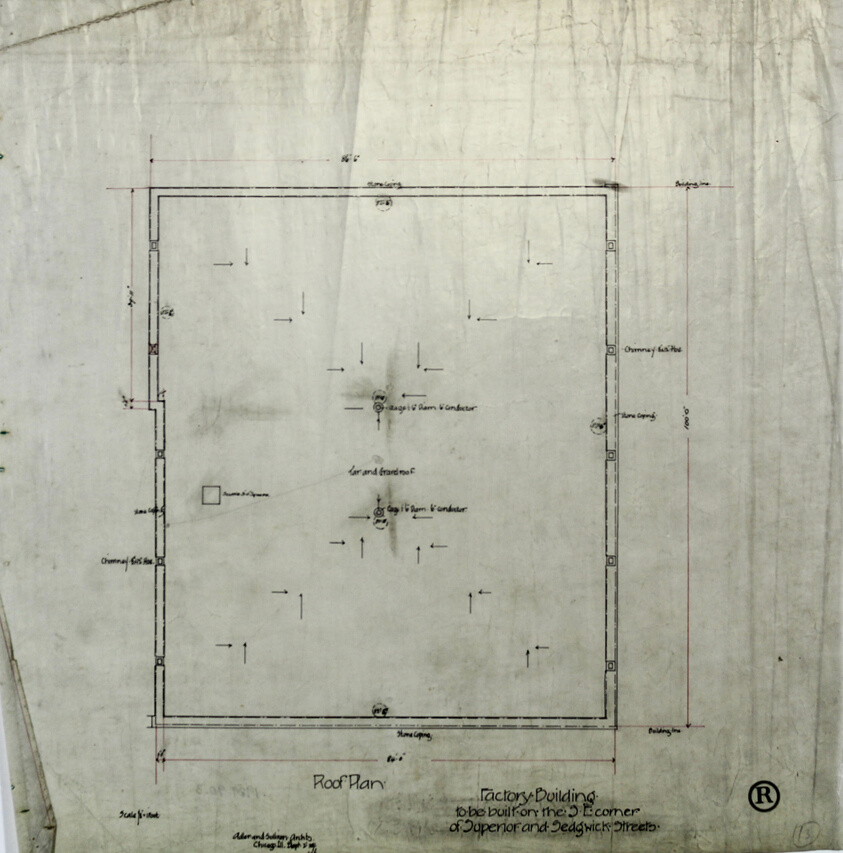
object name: Architectural Drawing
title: Brunswick Balke Collender Company Factory Building, Chicago, Illinois, Roof Plan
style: 19th century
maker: Adler & Sullivan, Architects; American, 1883-1895; Delineator: Curth, William F.; American, 19th cen.; Delineator: Gill, Irving J.; American, 1870-1936; Delineator: Self, Charles J.; American, 19th Cen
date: 1891 Destroyed by fire on April 15, 1989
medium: Black and red ink on linen with pencil notes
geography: United States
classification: architectural drawing; architecture; architectural working drawing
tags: Chicago, office buildings, buildings, architecture, plan, illinois